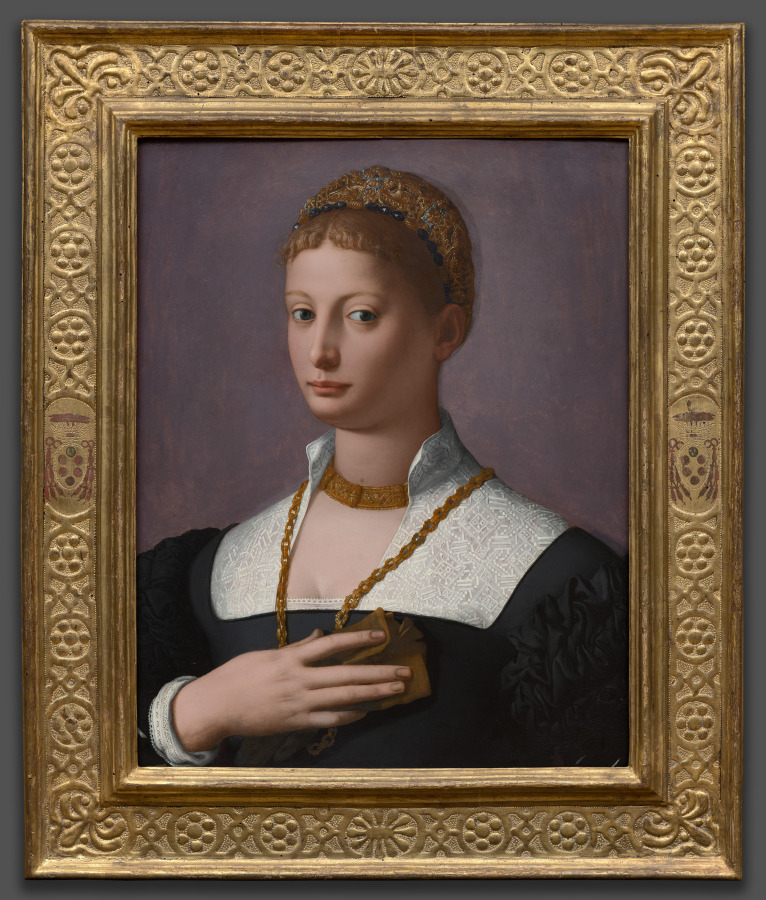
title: Portrait of a Woman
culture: Italy, Florence, 16th century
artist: Agnolo Bronzino (Italian, 1503–1572)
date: c. 1550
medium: oil on wood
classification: Painting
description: Bronzino was court painter to Cosimo I de’Medici, the Duke of Florence. Though the woman cannot be definitively identified, she was likely affiliated with the Medici court. As in most of the portraits in this gallery, Bronzino emphasizes wealth, status, and courtly refinement above personality or individualized expression. The plain background further accentuates the work’s monumentality and grandeur, despite its small scale. The hand placed against the chest with elegantly spread fingers extends back to an ancient Greek pose of modesty, here emphasizing the proper comportment of a woman of high status. The sitter wears a linen partlet (collar) delicately embroidered in matt stitch, part of which is, like her cuffs, trimmed in fine lace.